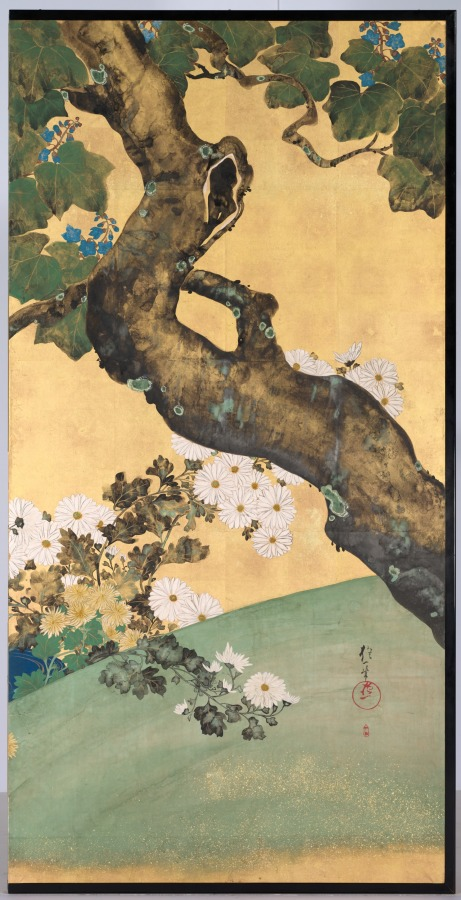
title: Paulownias and Chrysanthemums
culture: Japan, Edo period (1615–1868)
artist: Sakai Hōitsu (Japanese, 1761–1828)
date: early 1800s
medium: Two-panel folding screen; ink and color on gilded paper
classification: Painting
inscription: inscription at right reads: "Hoitsu hitsu" (painted by Hoitsu); within circle: (Hoitsu); tiny gourd shape below encloses two characters "Bun-zen," Hoitsu's name.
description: In this screen, Sakai Hōitsu expertly deployed a painting technique called “dripping-in” (tarashikomi). Ink and color dripped on the surface, and allowed to pool there, created the illusionistic effect of lichen-dotted tree bark and twisted chrysanthemum leaves. Paulownia and chrysanthemum are signifiers of late spring and early autumn as well as emblems of the Japanese imperial house. Paulownia also has medicinal properties and associations with fortitude, while chrysanthemum symbolizes good government.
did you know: Hōitsu often painted two-panel folding screens for urban clients residing in smaller spaces. A painting after this one in the Itabashi Museum in Tokyo shows an extended composition across a pair of two-panel screens.